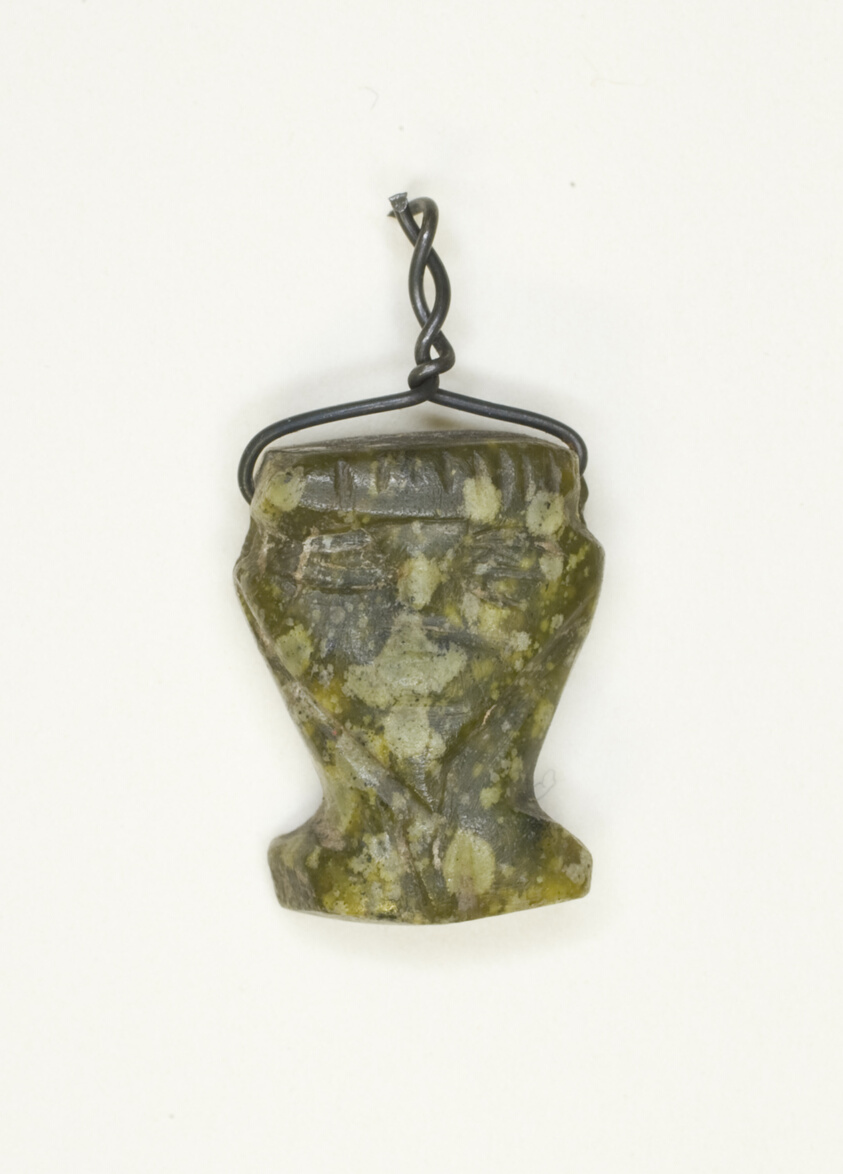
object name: Costume and Accessories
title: Amulet of the Goddess Hathor (?)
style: egyptian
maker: Egyptian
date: New Kingdom–Late Period (about 1550–332 BCE)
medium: Stone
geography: Egypt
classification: amulet; jewelry; stone; ancient art; costume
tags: goddesses